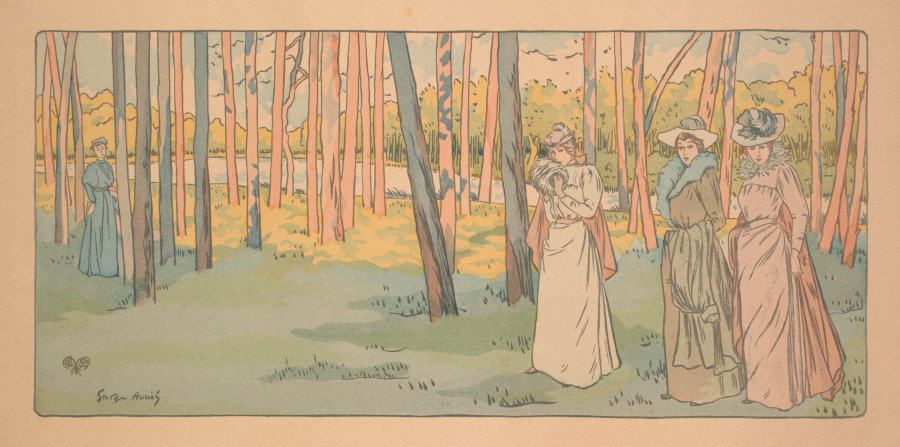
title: Promenade sur Bois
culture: France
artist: George Auriol (French, 1863–1938)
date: c. 1900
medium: color lithograph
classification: Print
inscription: Recto: In stone, lower left corner: Georges Auriol [cursive]; lower right margin, printed script: Offert par E. Greningaire, coloriste.Verso: lower right, in graphite: 010591 [enclosed with graphite rectangle]